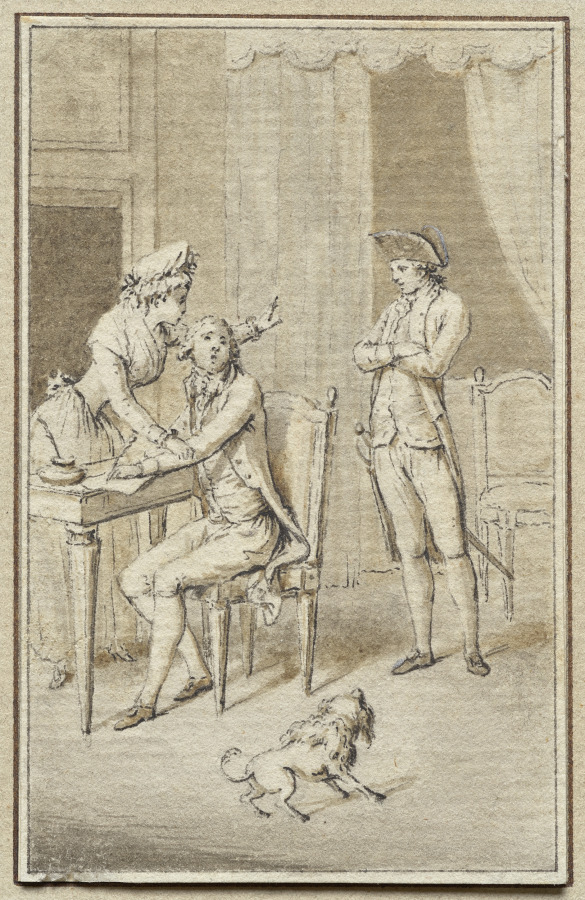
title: Three Figures with a Dog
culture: France, 18th century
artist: Jean-Michel the Younger Moreau (French, 1741–1814)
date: probably 1800s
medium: Pen and black ink with brown and gray washes and traces of white gouache (brim of standing man’s hat)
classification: Drawing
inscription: verso, center, in graphite: Moreau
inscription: verso of backing, lower center, encircled and written in graphite: 12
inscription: partial sticker on verso of backing, in blue ink: No (torn off) / Moreau le jeune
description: An accomplished draftsman in eighteenth-century France, Moreau the Younger produced numerous designs for book illustrations of which this may be an example. In this scene a woman directs the hand of a man as he writes. Raising her left hand, she gestures to the solider to remain at a distance while the small dog reacts to this peculiar encounter.